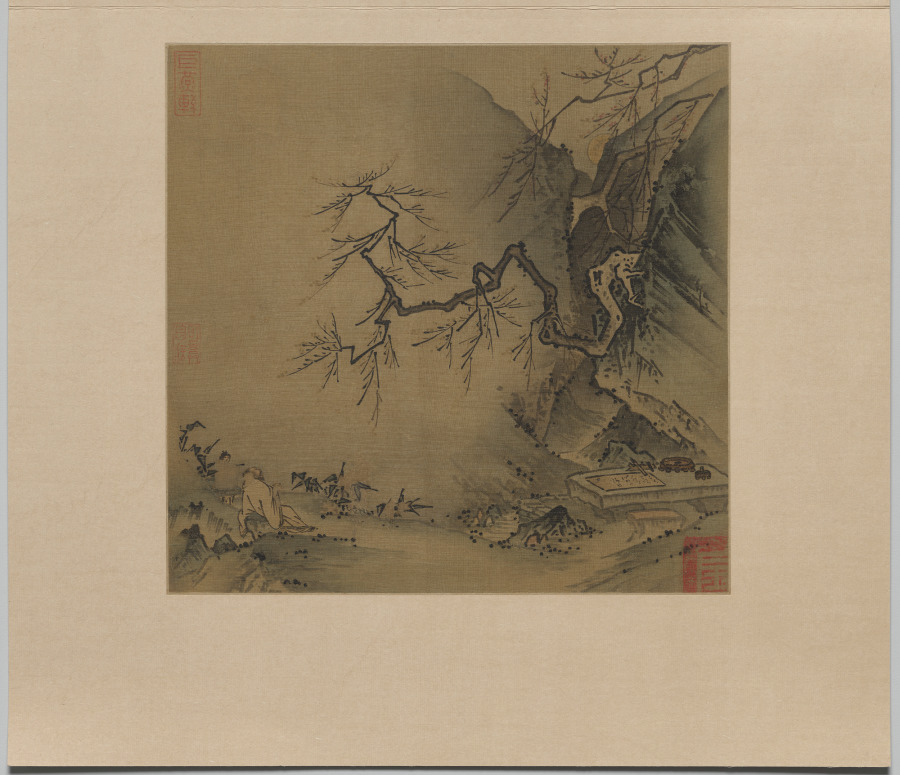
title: Drinking in the Moonlight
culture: China, Southern Song dynasty (1127-1279)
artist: Ma Yuan (Chinese, c. 1150–after 1255)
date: late 1100s–early 1200s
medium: Album leaf; ink on silk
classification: Painting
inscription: 1-1/2 seals: half-seal of Ming imperial collection (used 1372–84); 1 unidentified.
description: Once the moon rises and the wine is finished, perhaps the reclined tipsy gentleman will return to the stone table, where ink, paper, and brush can be seen. For moon enthusiasts in Hangzhou, there was a site named Yue Yan, or Moon Cliff, behind the imperial precincts on Mount Fenghuang. With its geographical features of receding craggy rocks leading to the framed full moon, there is good reason to believe that the scene depicts this specific site. The association of this painting with Ma Yuan is stylistically based. However, the brushwork accords more with the aesthetic approach of his son, Ma Lin.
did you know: The gentleman depicted is relaxing with a cup of wine in his hand.